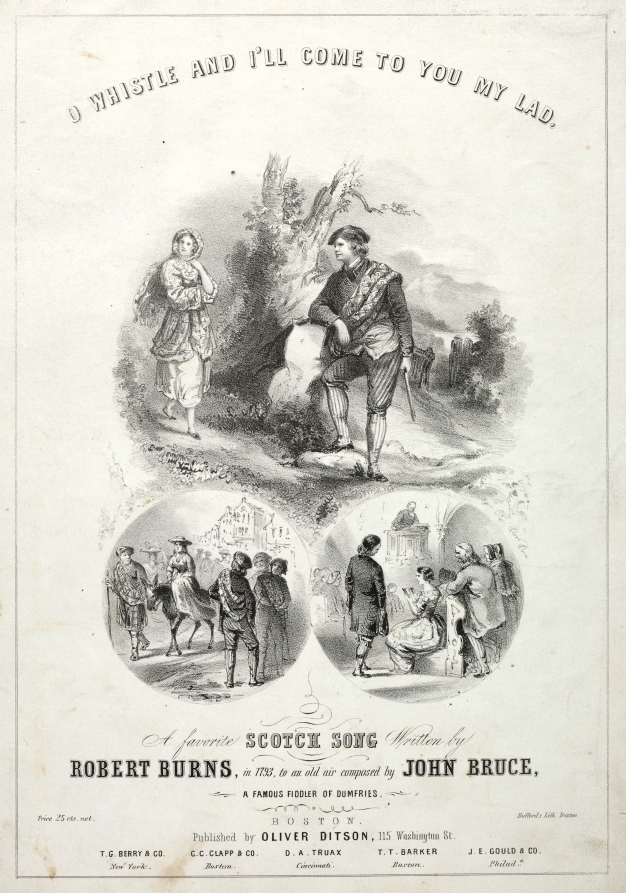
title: Oh Whistle and I'll Come to you, My Lad - Sheet Music Cover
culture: America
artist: Winslow Homer (American, 1836–1910)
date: c. 1855–57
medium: lithograph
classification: Print